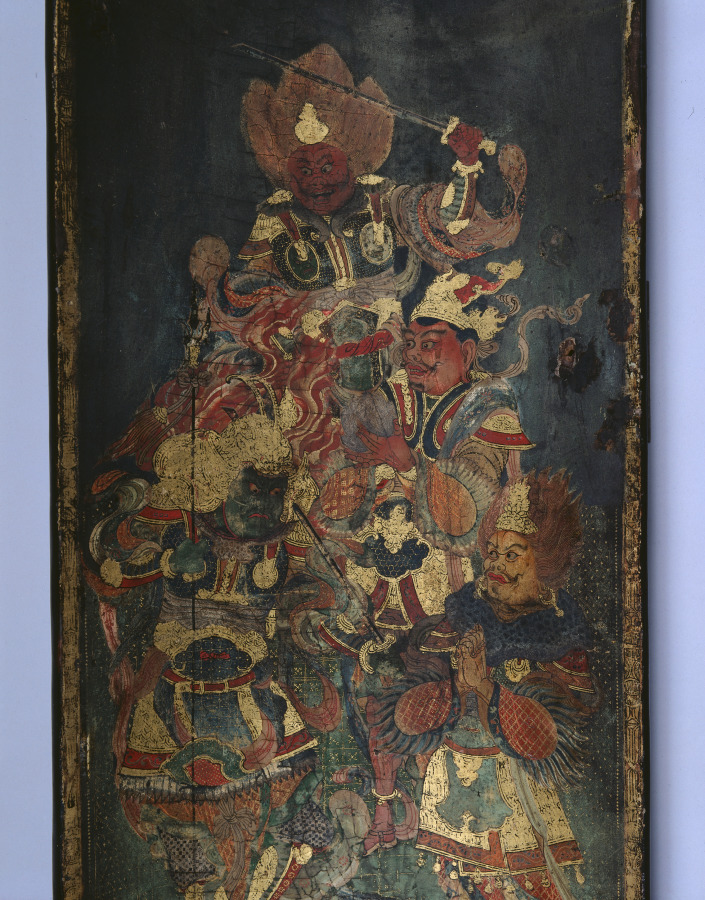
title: Repository for the Great Perfection of Wisdom Sutra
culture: Japan, Heian period (794–1185)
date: late 1100s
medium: lacquered wood with ink, color, gold, cut gold, and metalwork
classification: Lacquer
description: This repository is one of a pair that once contained the scrolls of a religious text called the Great Perfection of Wisdom Sutra. Two discs painted on the back have the sacred syllables representing the Buddha Shakyamuni and the Buddha Amida. Eight of the 16 benevolent but fierce looking deities who protect the text appear on the doors.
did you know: The mate to this object is in the Nara National Museum in Japan.